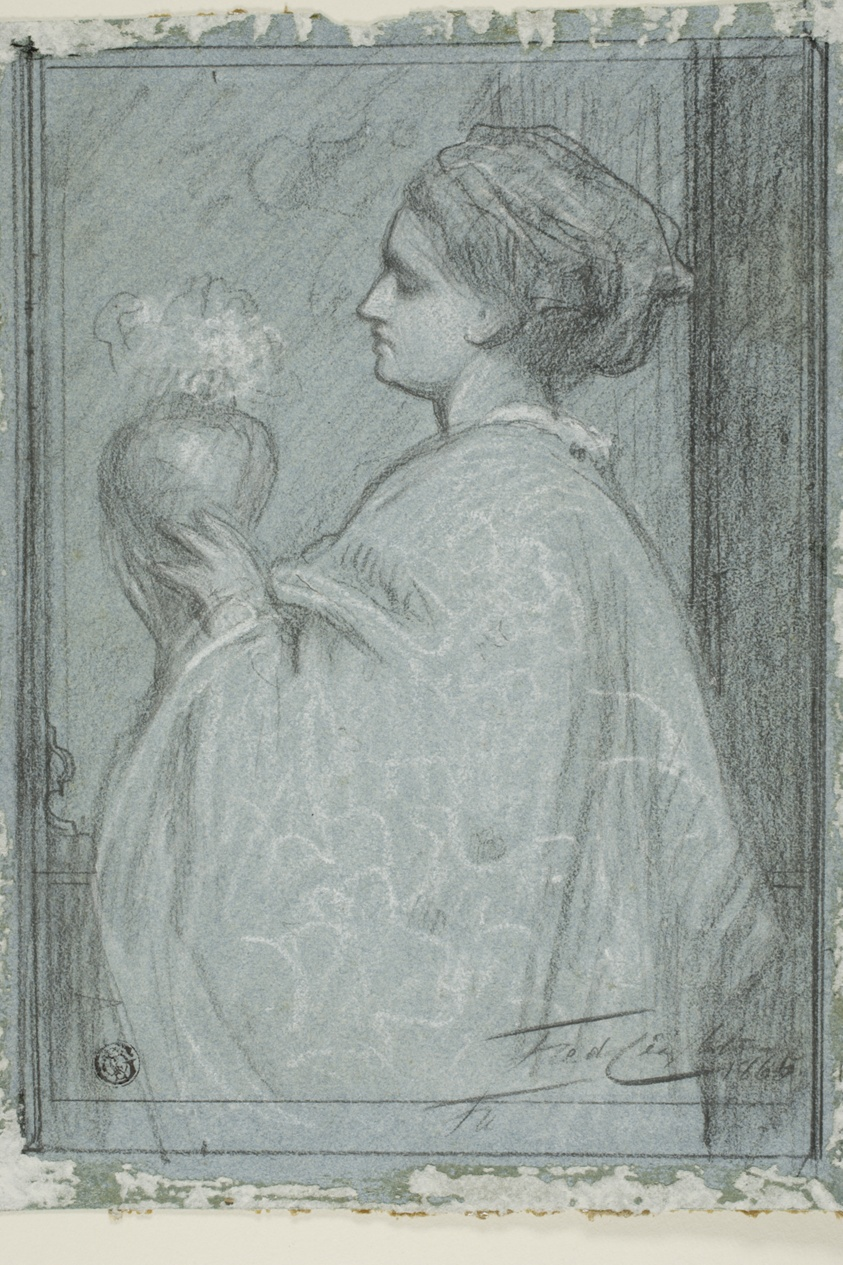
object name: Drawing and Watercolor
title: Lady with Vase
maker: Baron Frederic Leighton; English, 1830-1896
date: 1865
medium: Black and white chalk on blue wove paper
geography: England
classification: pastel; drawings (visual works); prints and drawing